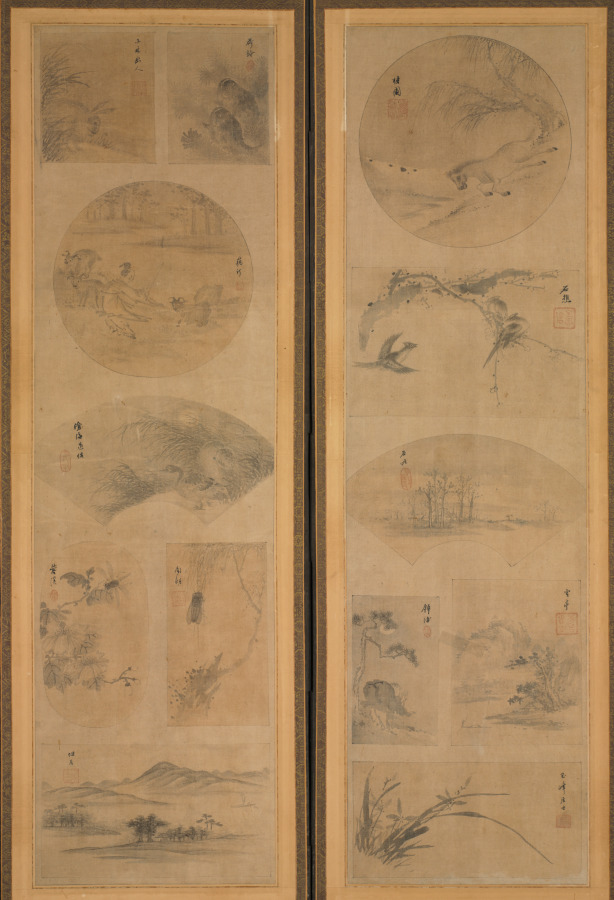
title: Painting of One Hundred Themes (obverse)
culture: Korea, Joseon dynasty (1392–1910)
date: late 1800s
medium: Ten-panel folding screen affixed with album leaves (obverse), calligraphy (reverse), ink and color on silk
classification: Painting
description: This screen depicts paintings on one side and poems on the other—an economical format often used in Korea to allow the viewer to enjoy both sides of one screen. The front features an assortment of bird-and-flower, landscape, and figural paintings executed according to the brush manner of more than 50 artists. A calligrapher has brushed several Chinese poems about the four seasons on the reverse side, among them "Composing in the Daytime of Summer" by Tang poet Liu Zongyuan (773–819) and "Composing when Spring Begins" by Song scholar Zhang Shi (1133–1180).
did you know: Depicting small images of various subjects became one of the most popular types of painting toward the end of the 19th century.